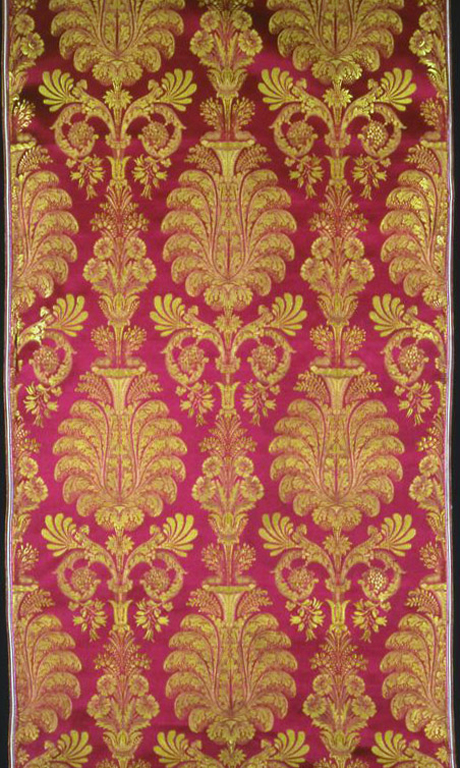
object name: Textile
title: Panel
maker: France, Lyon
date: 1850/70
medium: Silk, warp-float faced 7:1 satin weave self-patterned by ground weft floats and areas of plain and twill weaves; woven on loom with Jacquard attachment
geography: Lyon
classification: textile; weaving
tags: flowers, foliage